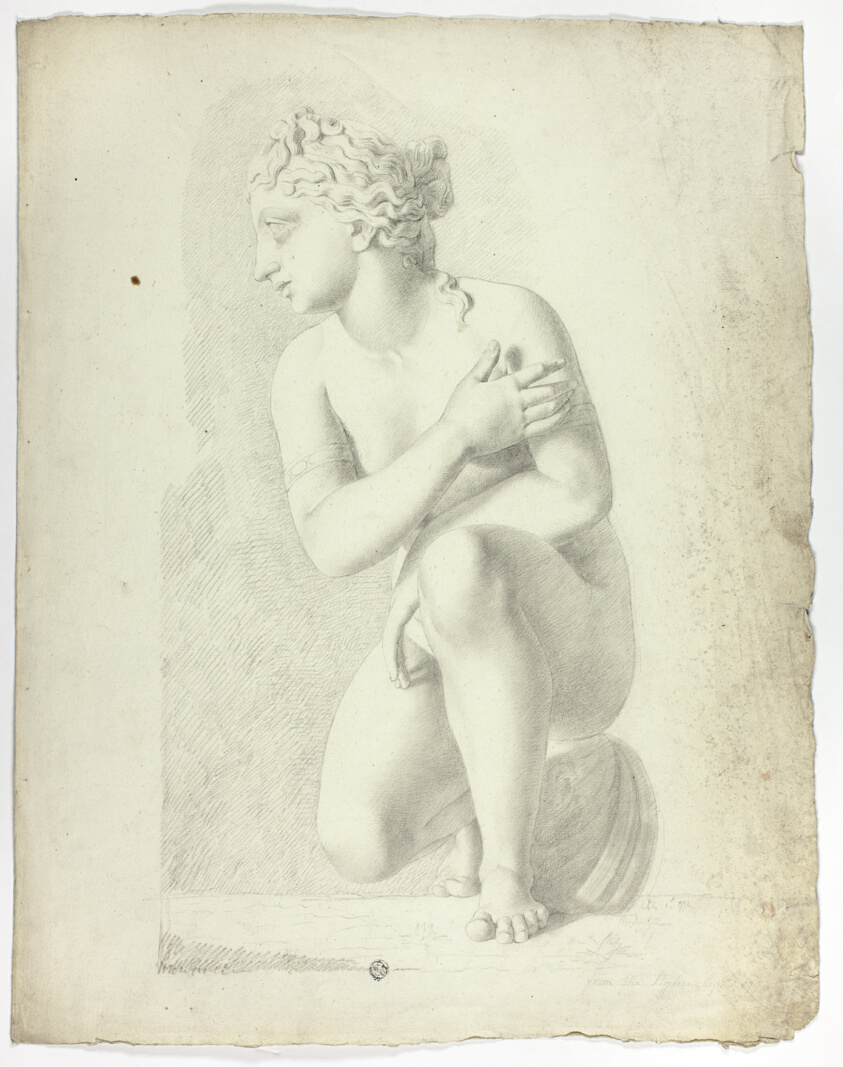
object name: Drawing and Watercolor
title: Statue of Crouching Venus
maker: John Downman (English, 1750-1824)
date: 1774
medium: Charcoal with stumping and touches of black crayon on ivory laid paper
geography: England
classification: charcoal; drawings (visual works); prints and drawing